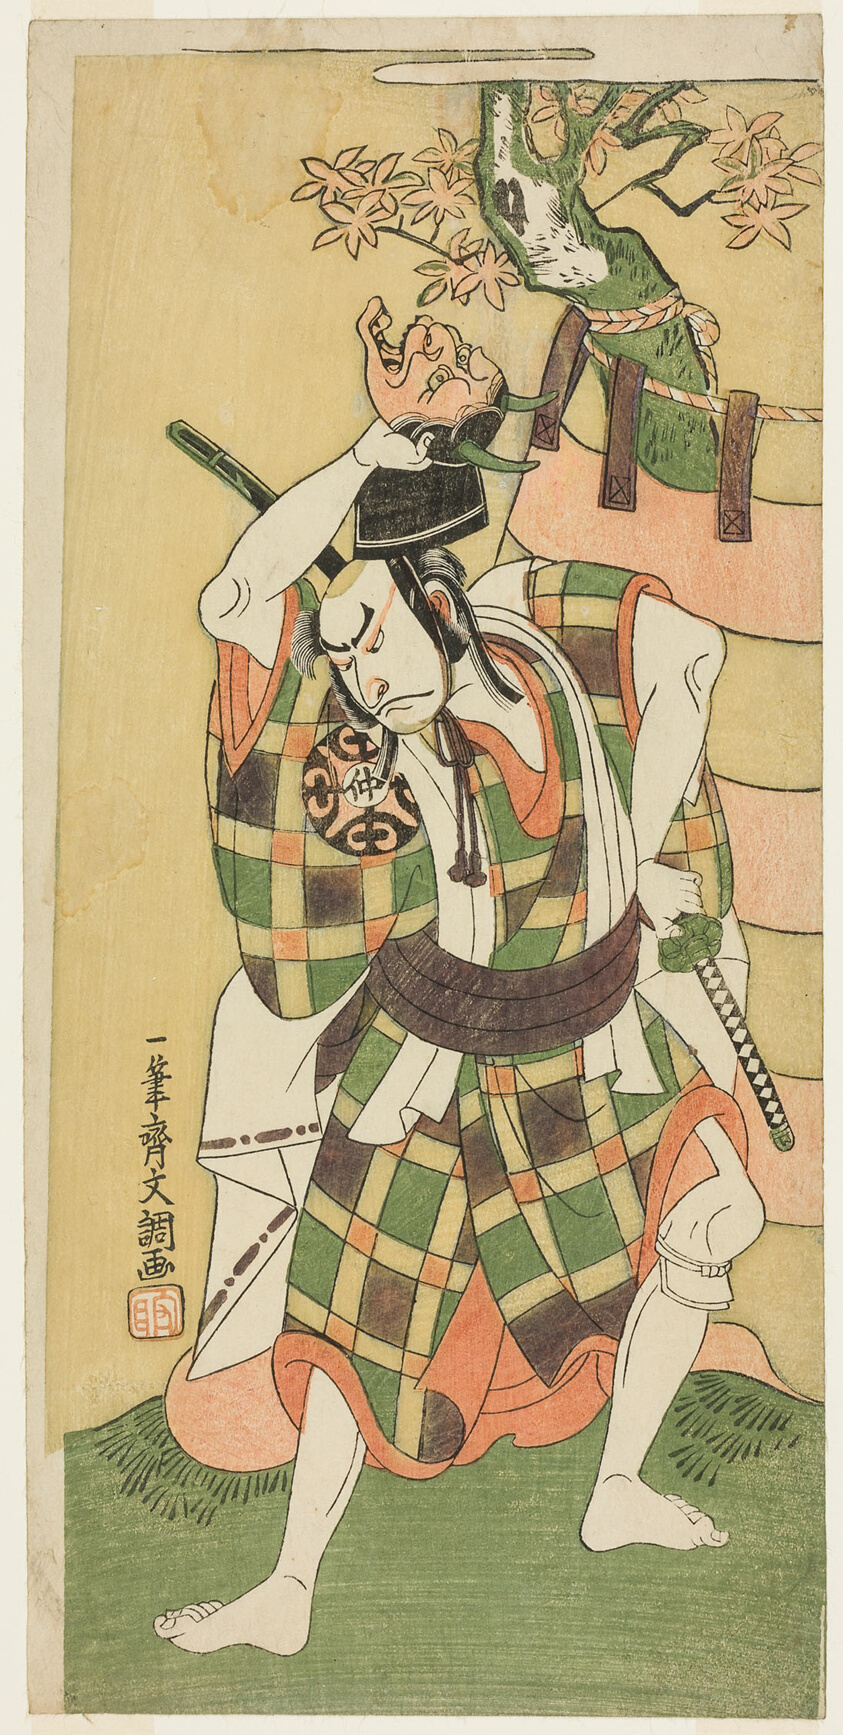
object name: Print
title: Actor Nakamura Nakazō I as Yamaoka no Saburō, in “The Ever-Blooming Potted Tree” (Kawaranu Hanasakae Hachino Ki)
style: Japanese (culture or style)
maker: Ippitsusai Bunchô; Japanese, active c.1755–90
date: 1769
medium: Color woodblock print; hosoban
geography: Japan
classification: woodblock print; print; asian art